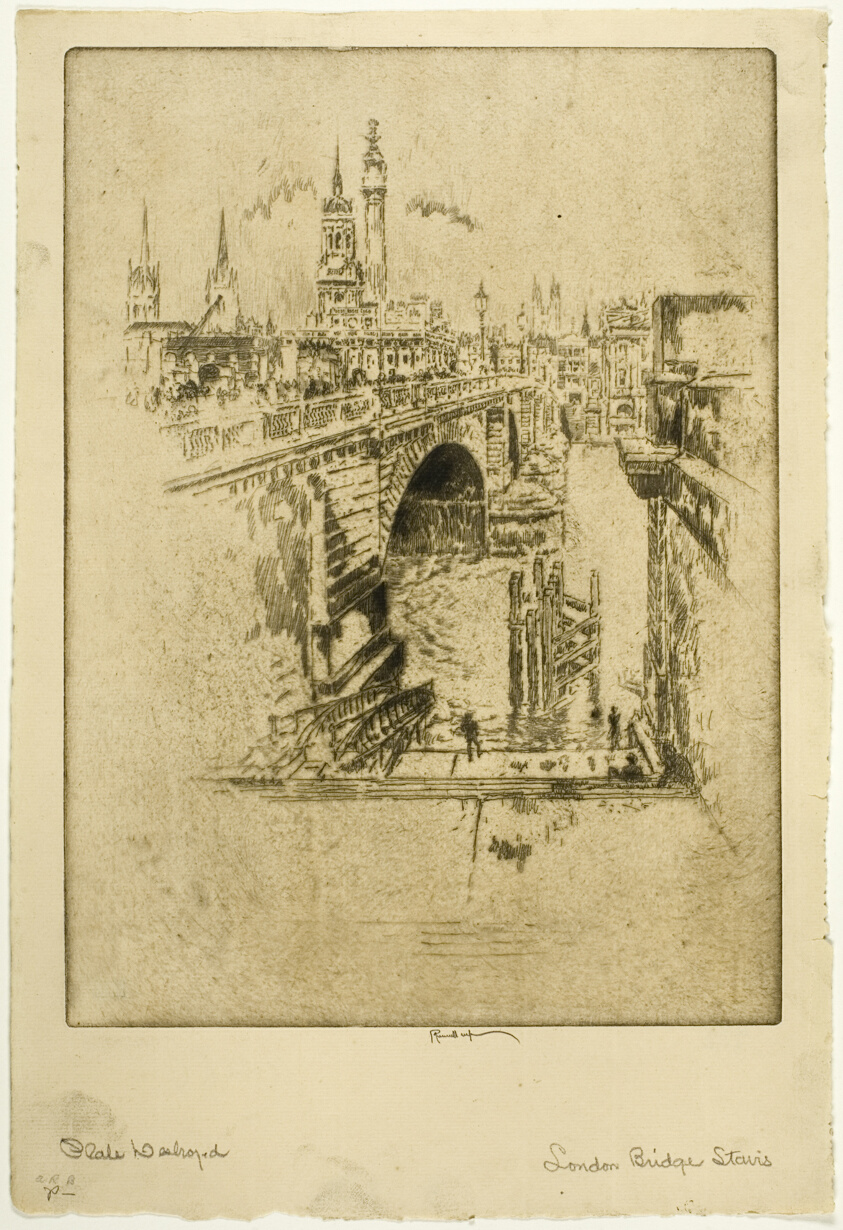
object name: Print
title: London Bridge Stairs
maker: Joseph Pennell (American, 1857-1926)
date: 1903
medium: Etching on ivory laid paper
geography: United States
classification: etching; print; prints and drawing